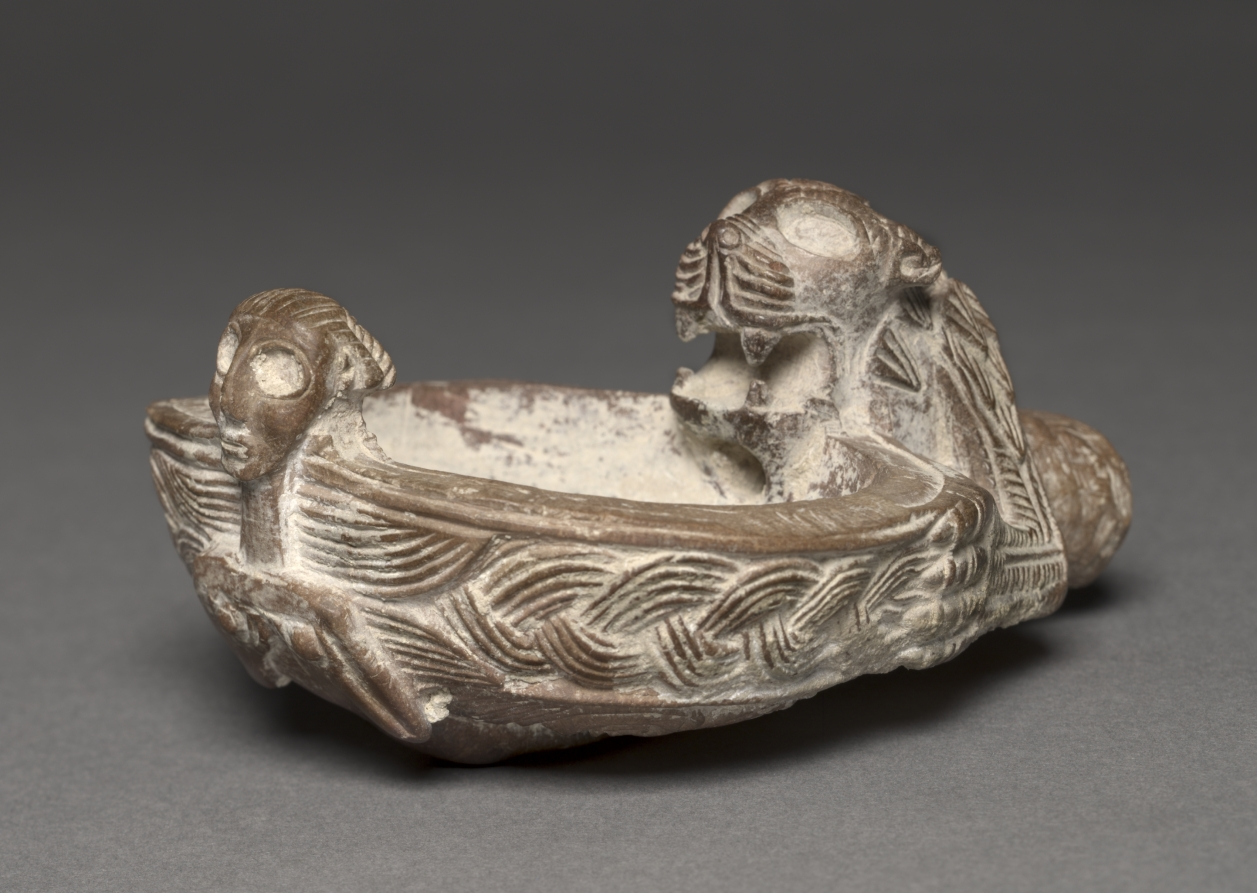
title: Libation Dish-Jar Stopper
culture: Syria, Hittite (?) or Middle Iron Age, Tell Ahmar, Djezizeh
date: 1600–700 BCE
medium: stone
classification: Sculpture